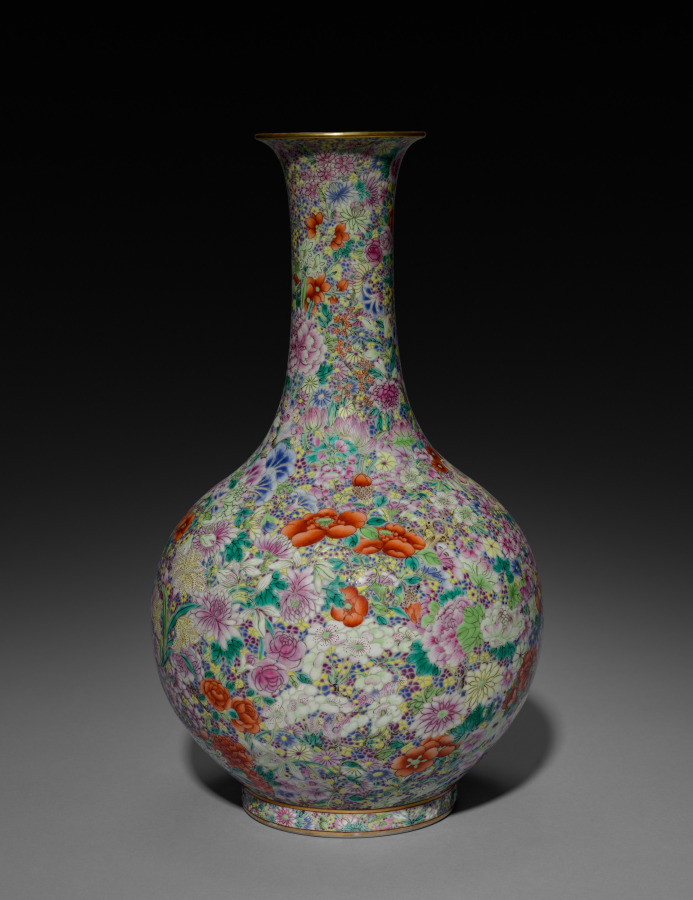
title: Bottle-Shaped Vase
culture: China, Qing dynasty (1644–1911), Jiaqing reign (1796–1820)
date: 1796–1820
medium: Porcelain, overglaze colors and gold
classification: Ceramic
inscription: 大清嘉慶年制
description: This vase is densely decorated with peonies, morning glories, lilies, and lotuses. Purple, yellow, and blue petals fill the surface, forming a continuous millefleur (thousand-flower) pattern. Each petal is delicately shaded to suggest volume and depth, creating a vivid yet orderly composition. The mouth is painted with gold pigment to imitate metal, evoking the appearance of copper-body-painted enamel as seen in Qing dynasty court art. Qing palace records indicate that vases with such patterns were used in everyday flower-viewing displays. In late Qing inventories, comparable examples were listed as furnishings for the emperor and his consorts.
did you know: Porcelain with this dense floral millefleurs decoration and a multitude of overglaze enamel colors was first made in the Qing dynasty and remained popular into the late 1800s.